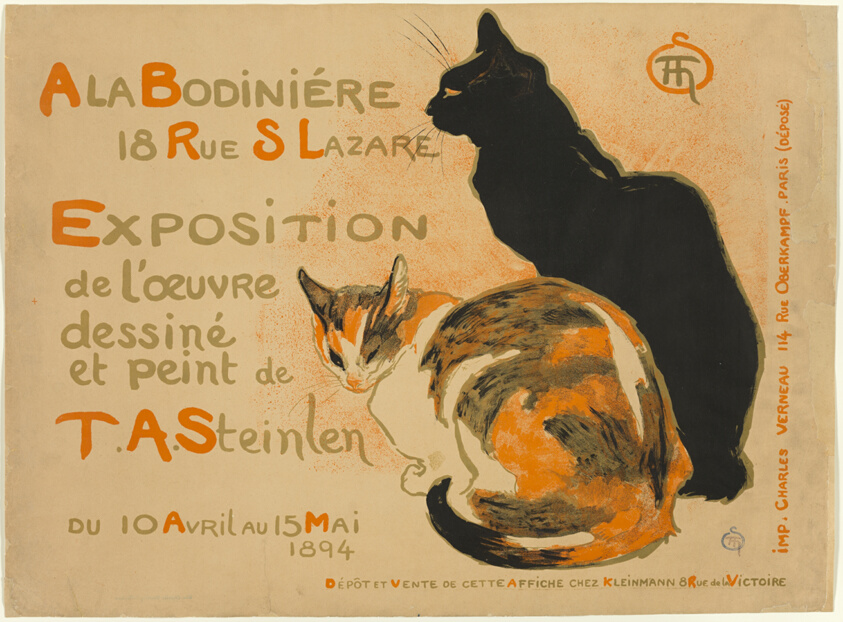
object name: Print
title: À la Bodiniére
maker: Théophile-Alexandre Steinlen; French, born Switzerland, 1859-1923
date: 1894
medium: Lithograph in black, olive, orange and blue on tan wove paper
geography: France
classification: lithograph; print; prints and drawing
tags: cats, animals